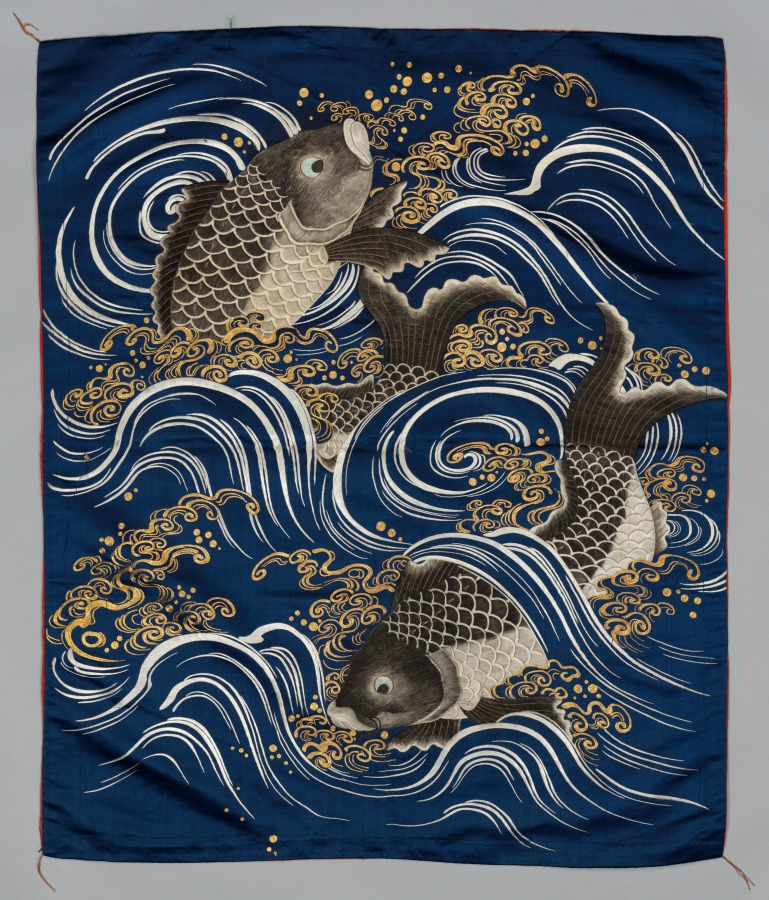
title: Gift Cover (Fukusa) with Carp in Waves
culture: Japan, Meiji period (1868–1912)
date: 1868–1912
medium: Silk: embroidered; metallic thread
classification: Embroidery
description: The motif of carp in rough water originated in China. The expression “carp jumping over the Dragon Gate” (liyu tiao longmen) refers to attaining success in life, or, historically, to passing the imperial examinations for civil service. Dragon Gate is a steep gorge of the Yellow River at Hejing in Shanxi province, and it was once said that if a carp swimming upstream could surmount the gorge, it would instantly transform into a dragon and fly into the sky. In Japan, therefore, a gift cover (fukusa) like this would have been appropriate to celebrate the recipient’s achievements.